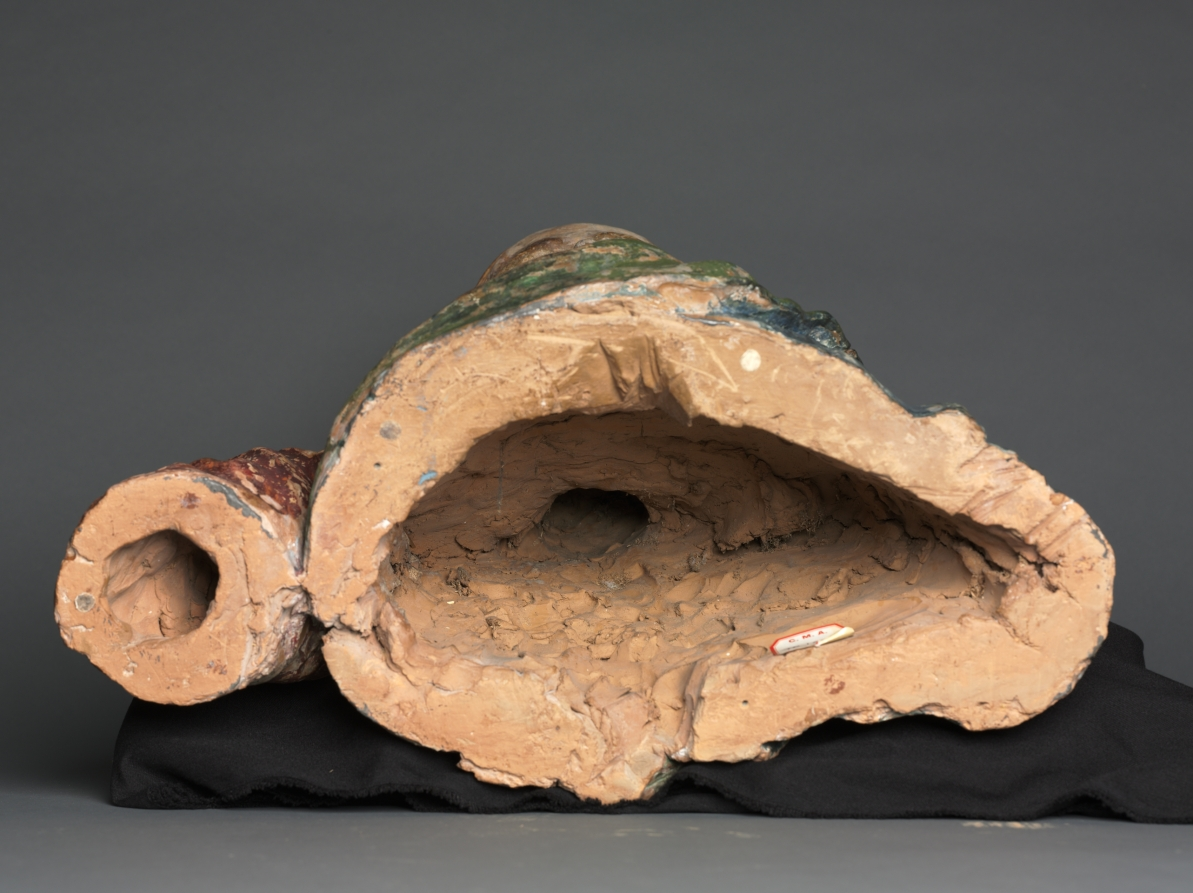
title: Bust of Christ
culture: Italy, Florence, 15th century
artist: workshop of Andrea del Verrocchio (Italian, 1435–1488)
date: c. 1470–1500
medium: painted terracotta and wood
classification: Sculpture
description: In the late 1400s Andrea del Verrochio set up a large workshop where he and his assistants reproduced copies of his sculpture and other works for a middle-class market. Originality was not the objective; in fact, most people were only interested in purchasing replicas of well-known works. This sculpture was modeled after Verrocchio's Christ figure in the bronze sculpture group Christ and St. Thomas at Orsanmichele in Florence, Italy. The medium of terracotta, which was cheaper than bronze or marble, made it possible to offer copies at a reasonable price. Additionally, workshop practices reduced the cost of the work by reducing labor time. Assistants were usually responsible for the shaping of the torso and garments, while Verrocchio was often in charge of executing the facial features and hair. In this sculpture the torso is out of proportion, and the general discrepancy in quality between the parts of the sculpture is due to the fact that it is a workshop production. Given that the facial features are so well executed and the statue retains a stirring motional quality, a trademark of Verrocchio's style which artists found hard to duplicate, it is probable that this sculpture was made in Verrocchio's studio, possibly even with active involvement by the artist on the head.